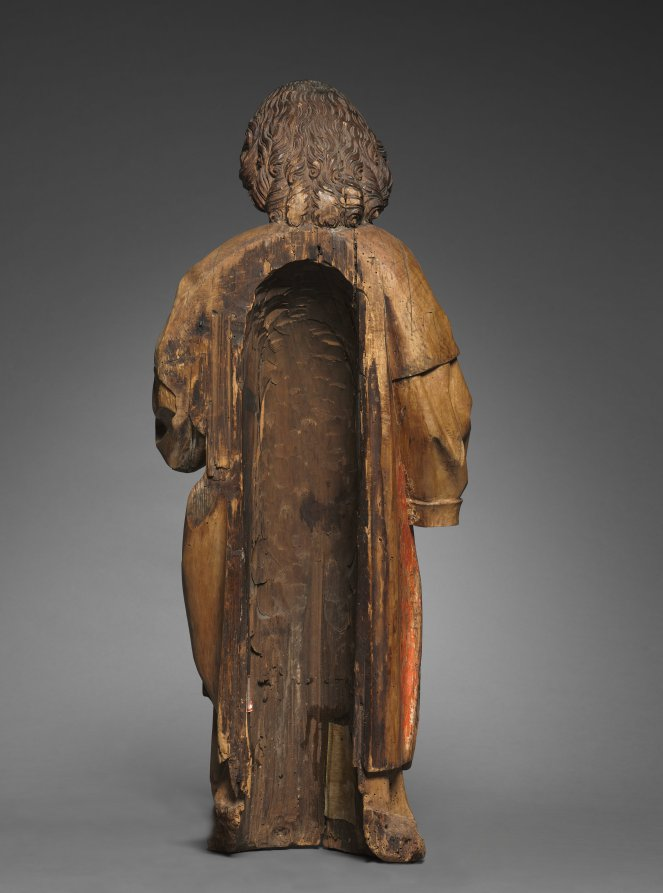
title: Saint Lawrence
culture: Austria, South Tyrol, late 15th century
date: c. 1490–1500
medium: lindenwood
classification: Sculpture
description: Lawrence of Rome (about 225–258 CE) was one of the seven deacons of ancient Rome martyred in 258 CE, and became one of the most widely venerated saints during the Middle Ages. According to tradition, he met his martyrdom by being roasted on a gridiron, an attribute which he either holds or stands upon in art. (See a depiction of him by Tilman Riemenschneider nearby in this gallery.) Lawrence is always portrayed as a young man wearing the deacon’s dalmatic. The original source and context of this sculpture is not known. Since it is not carved in the round, it was likely placed within the niche of a large altarpiece.